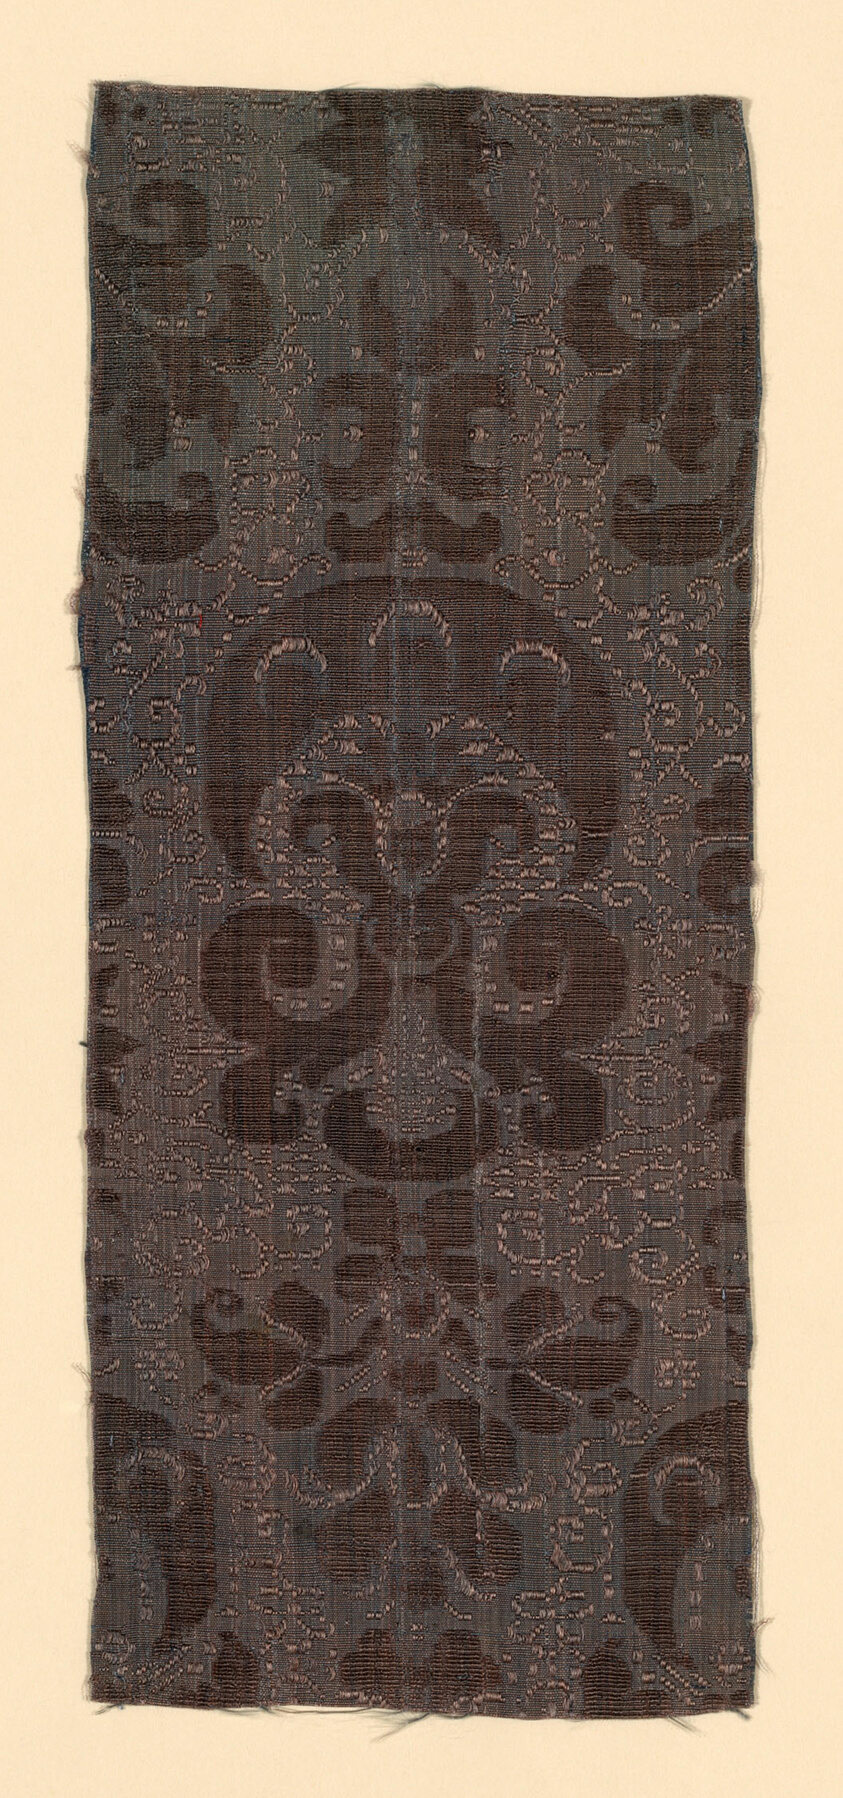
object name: Textile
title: Fragment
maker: Italy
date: 18th century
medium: Silk, plain weave with supplementary pile warps forming patterning floats and uncut voided velvet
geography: Italy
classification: textile; weaving - velvet; weaving